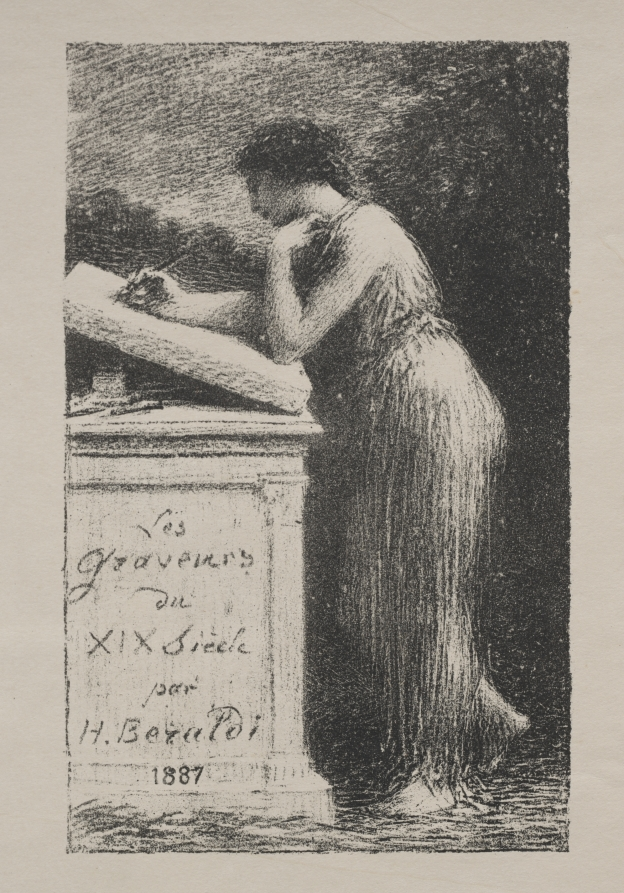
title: The Lithograph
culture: France, 19th century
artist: Henri Fantin-Latour (French, 1836–1904)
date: 1887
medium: lithograph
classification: Print